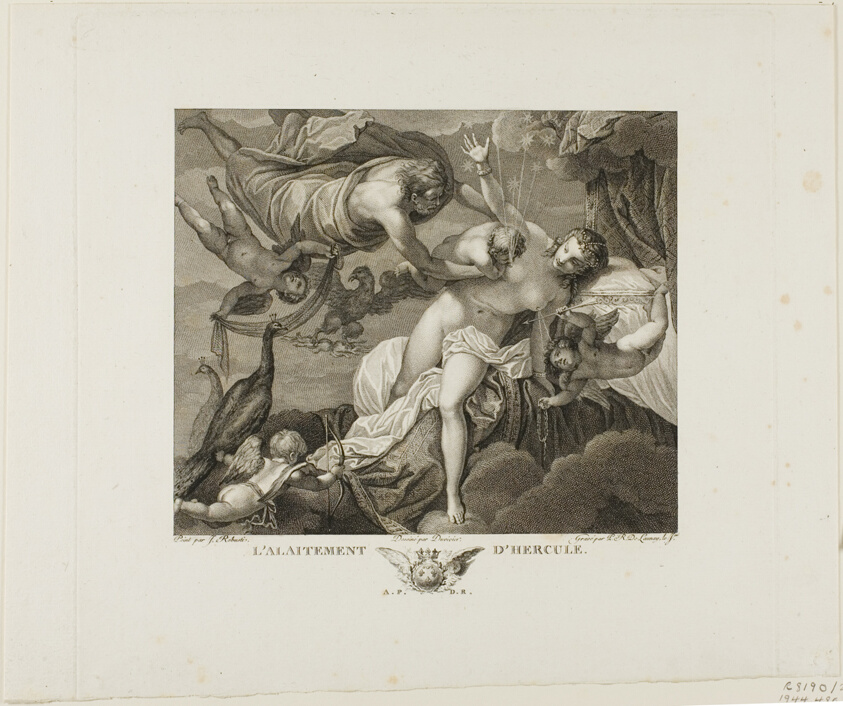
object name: Print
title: The Suckling of Hercules, plate two from La Galerie du Palais Royal, volume II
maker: Robert Delaunay (French, 1749-1814); after the drawing by Bernard Duvivier (Flemish, 1762-1837); after the painting by Jacopo Robusti, called Tintoretto (Italian, 1519-1594); published by Jacques Couché (French, b. 1750)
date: 1808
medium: Engraving on ivory laid paper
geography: France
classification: engraving; print; prints and drawing